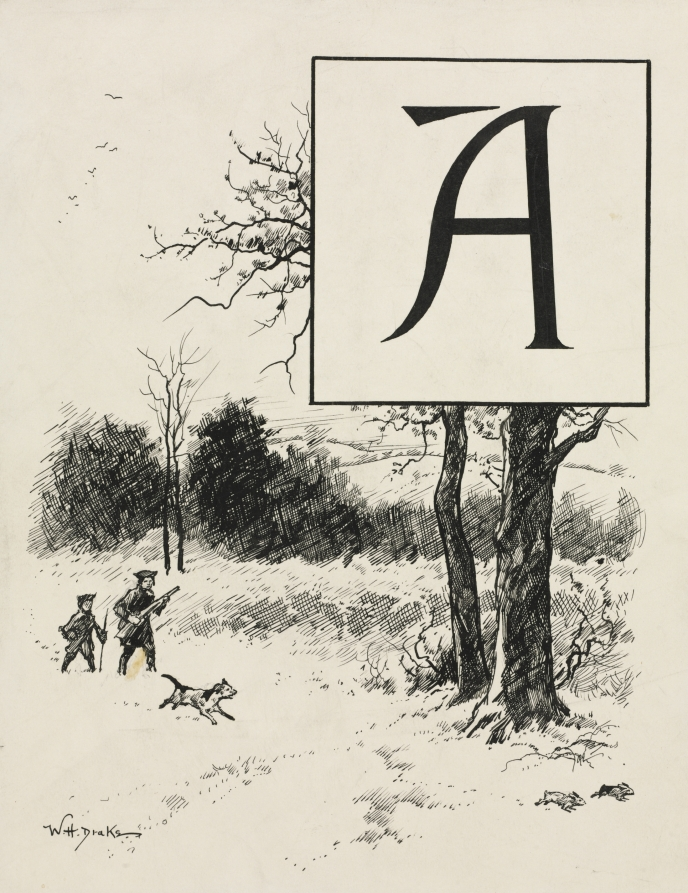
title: Inital A for Chapter VI from "Lorna Doone"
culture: America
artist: William Henry Drake (American, 1856–1926)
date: c. 1889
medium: pen and ink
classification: Drawing